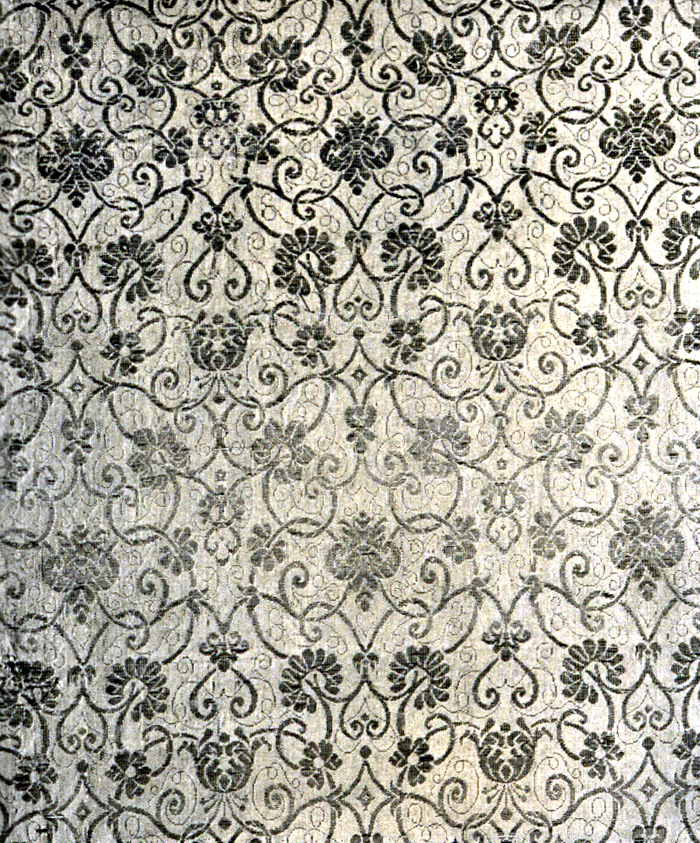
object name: Textile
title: Panel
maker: France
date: c. 1700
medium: silk, plain compound cloth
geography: France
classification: textile; weaving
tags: flowers, scrolls (motifs)